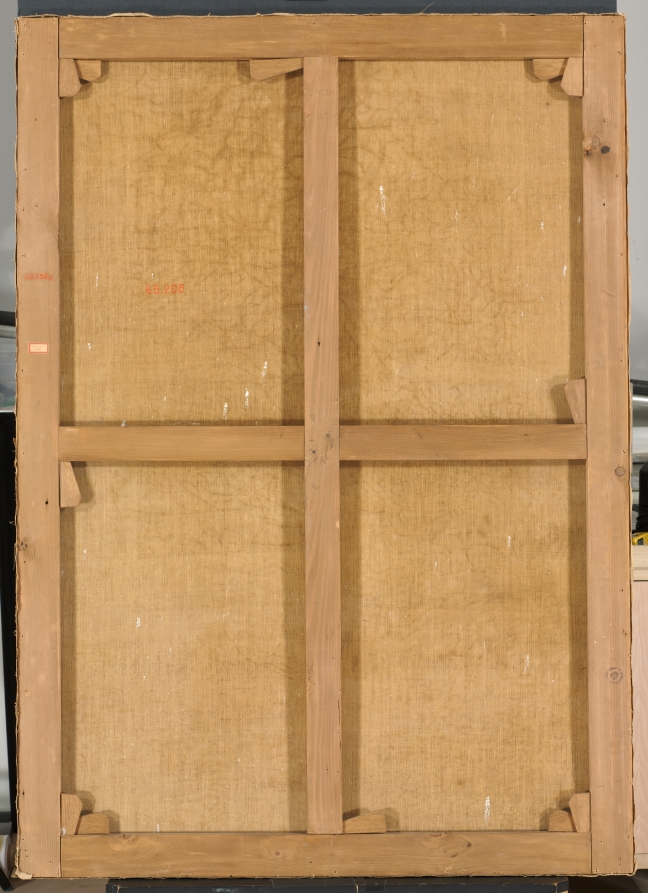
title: Study for "The Apotheosis of Ferdinand IV and Maria Carolina, King and Queen of Naples" (for the Palazzo dei Regi Studi, Naples)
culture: Italy, 18th century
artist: Pietro Bardellino (Italian, 1728–1810)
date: c. 1781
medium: oil on canvas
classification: Painting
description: This large oil painting was thought to be an early, rough sketch for the ceiling of the Salone de Biblioteca Antica in the Palazzo degli Studi in Naples. The attribution to Bardellino was based on the sketch's similarity to another sketch by the artist, sold in New York in 1972, which is more closely related to the ceiling painting. It is assumed that the Cleveland work preceded the more finished oil sketch and that both models were created in preparation for the Palazzo degli Studi's Apotheosis, completed in 1781. The Cleveland sketch was almost completely altered in the final composition. The cartouche, or grouping of regal paraphernalia, which is the main feature of the Cleveland sketch, was omitted in the final ceiling painting. This medallion conveys the idea that the reign of the royal couple is filled with fortune. Bardellino used atmospheric colors and his delicate touch in this heavenly vision of angels and virtues, and the angels hold a chain bearing the orders of the royal family. From left to right are the Order of San Januarius, the Order of the Holy Spirit of France, the Order of the Golden Fleece (represented by the lamb), and the Order of St. George of Constantine. The large oval shape, empty in the Cleveland sketch, also appears in the final version, where the oval is smaller and frames a portrait of Ferdinand and Maria. Rather than representing an apotheosis of the bodies of the royal couple, Bardellino shows their ascent in the raising of their portraits to heaven. While the Palazzo degli Studi painting differs greatly from the Cleveland version, the oval space in the Cleveland sketch suggests Bardellino's plans for the inclusion of the royal portrait in the final ceiling painting.